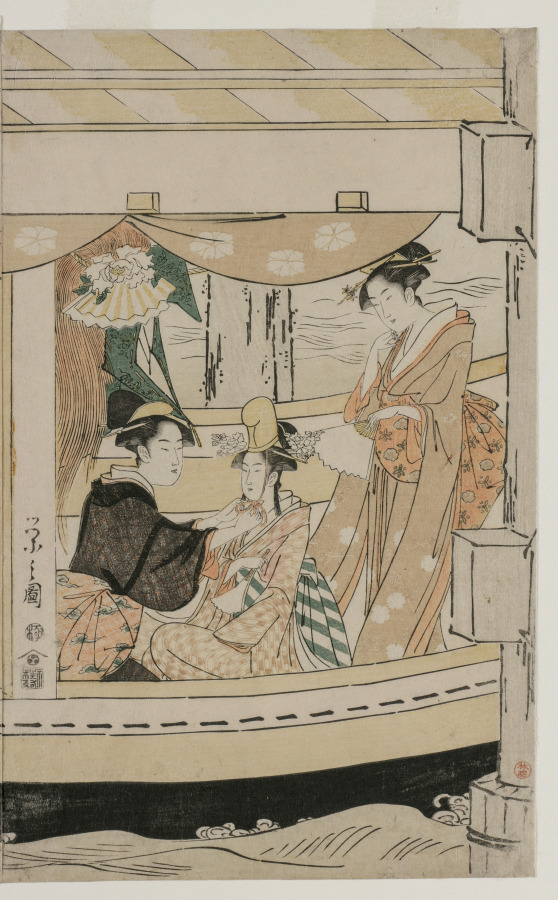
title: Party on the Pleasure Boat Kawaichimaru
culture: Japan, Edo period (1615–1868)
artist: Chōbunsai Eishi (Japanese, 1756–1829)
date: c. 1796–97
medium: One of a pentaptych of color woodblock prints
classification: Print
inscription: Signature: Eishi zu Seal: kiwame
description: A pleasure boat named Kawaichimaru is filled with entertainers in this expansive scene. At the vessel’s right end, a young dancer waits as her costume’s hat is arranged. In the middle, a trio of musicians performs, two on drums and another on shamisen, a three-stringed instrument. Listening to them is an elegant woman smoking her pipe. At the left end, three women, one on a neighboring boat, enjoy a spectacular floral arrangement of pine, lily, and iris on a lacquer stand.